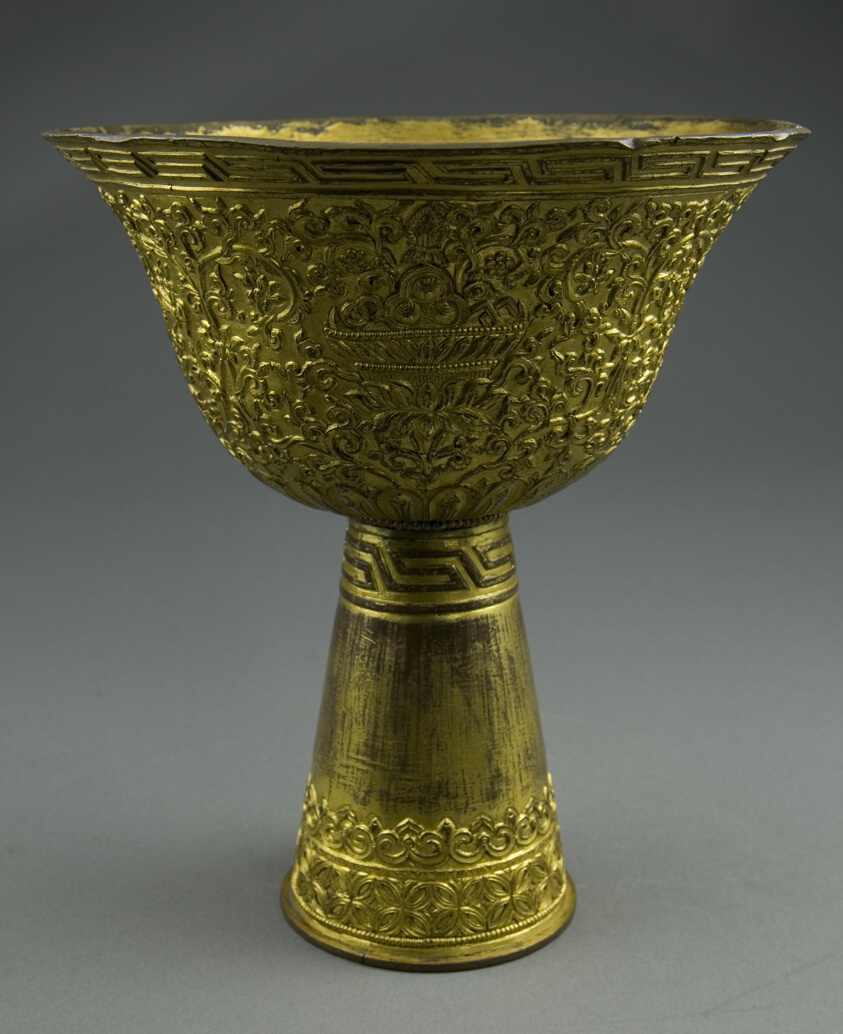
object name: Vessel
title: Stem-cup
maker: China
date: Yuan dynasty (1206–1398)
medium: Gilt bronze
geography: China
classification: bronze; metal; vessel; asian art